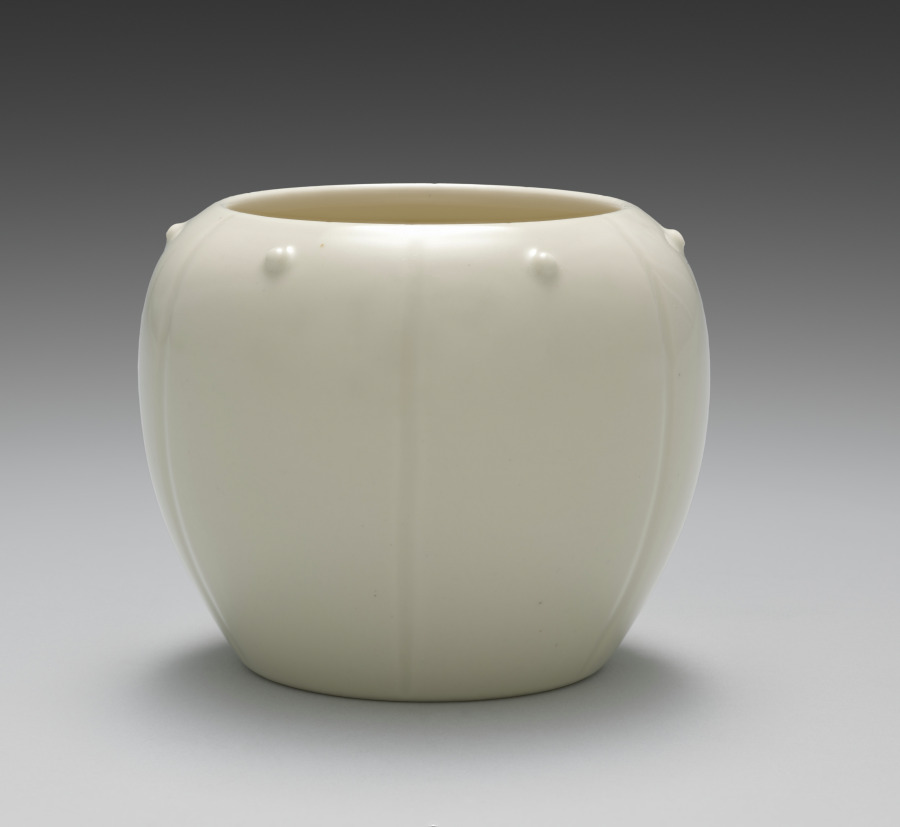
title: Container from Lit Charcoal and Ash Containers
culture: Japan, Meiji period (1868–1912)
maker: Seifū Yohei III (Japanese, 1851–1914)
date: 1893–1914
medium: One from a set of four containers; porcelain with molded design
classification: Ceramic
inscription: 清風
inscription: The storage box for this set is inscribed and impressed with seals.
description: The box lid for these six-lobed lit charcoal and ash containers, or hiire, identifies them as kōhakuji, another of Yohei III’s translucent cream colors over ivory clay bodies. One might translate the name as “lustrous pearl[–glazed ivory] porcelain.” A hiire was filled with ash with burnt coals at the center so that embers and tobacco ash could be discarded safely during a gathering. Each of the lobes on the containers has a round protrusion set below the rim. The studlike pattern is called ruiza. The term is also used to describe the pattern that rings the shoulder of some flower vases or metal kettles used in chanoyu.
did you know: The Seifu studio generally followed the standard practice in Japan for identifying the artist and object in box inscriptions.